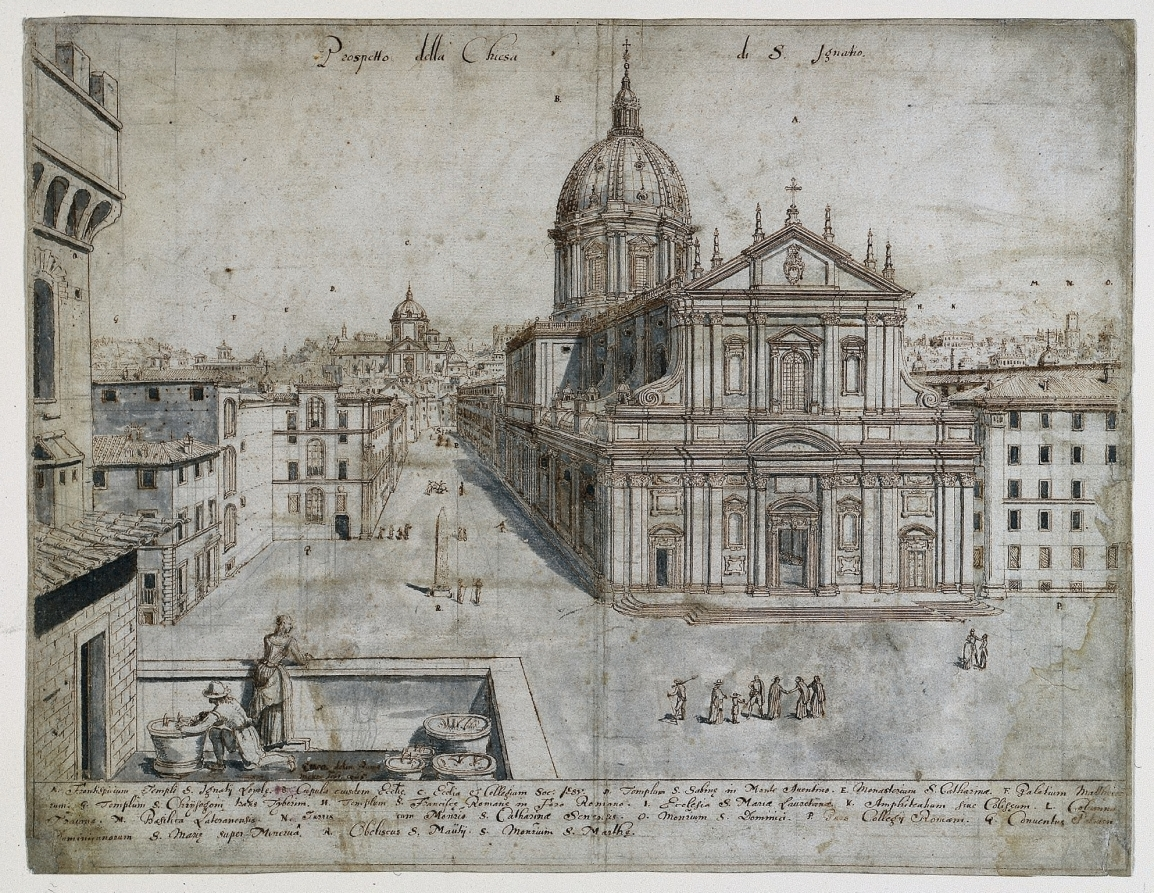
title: Eighteen Views of Rome: The Church of Sant'Ignazio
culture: Flanders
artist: Lievin Cruyl (Flemish, c. 1640-c. 1720)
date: 1665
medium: pen and brown ink and brush and gray wash over graphite; framing lines in brown ink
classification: Drawing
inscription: signed, lower left, in brown ink: [artist's monogram: LC] RVYL delin. Romæ / mense Febr. 1665 ; by artist, upper center, in brown ink: Prospetto della Chiesa di S. Ignazio ; by artist, throughout composition, in brown ink: [the letters A-S] ; by artist, across bottom, in brown ink: A. Frontispicium Templi S. Ignatij Loyolæ. B. Cupula eiusdem Eccliæ. C. Ecclia et Collegium Soc: Jesu. D. Templum S. Sabinæ in Monte Aventino. E. Monasterium S. Catherinæ. F. Palatium Mattheio= / rum. G. Templum S. Chrijsogoni trans Tyberim. H. Templum S. Franciscæ Romanæ in Foro Romano. I. Ecceslia S. Mariæ Lauretanæ. K. Amphiteatrum sive Colisseum. L. Colonna / Traiana. M. Basilica Lateranensis. N. Turris cum Monrio. S. Catherinæ Senensis. O. Monrium S. Dominici. P. Pars Collegij Romani. Q. Conventus Patrium / Dominicorium S. Mariæ super Minervâ. R. Obeliscus S. Maürtij. S. Monrium S. Marthæ. ; VERSO, upper left, in brown ink [S45..?][masked] ; upper left, in graphite: n. 545 ; ON STRIPS OF PAPER MOUNTED TO VERSO, lower right, in graphite: A20978 ; lower right, in graphite: E. 12